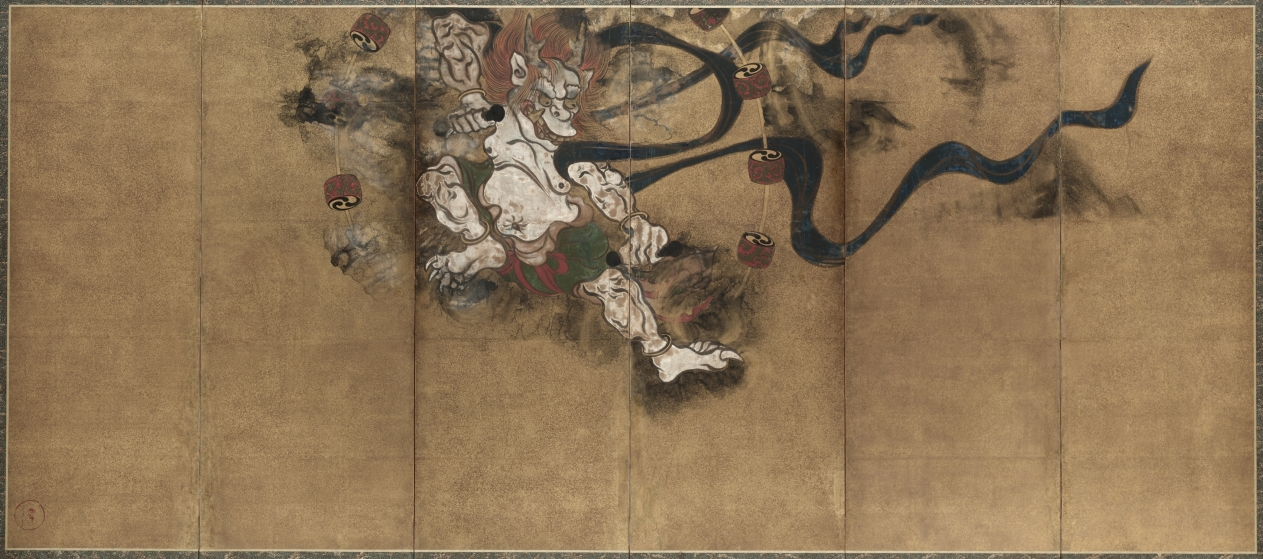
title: God of Thunder (Raijin)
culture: Japan, Edo period (1615–1868)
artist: studio of Tawaraya Sōtatsu (Japanese, c. 1570–c. 1640)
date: mid-1600s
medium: six-panel folding screen; ink, color, and gold on paper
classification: Painting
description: Such depictions of the God of Thunder originated in Buddhist art. Here, the image was painted on paper covered with gold dust, a technique often found in paintings by Tawaraya Sotatsu or of the Sotatsu school. This gold technique and the "Inen" seal here suggest that the anonymous painter of this screen was probably associated with the Sotatsu workshop. The artist used a prototype borrowed from earlier Japanese narrative painting—rather than mechanically reproducing Sotatsu’s image—and created a bold, innovative image that served the world of play and leisure in early Edo Japan. The theme of "God of Thunder" was often paired with "God of Wind" and has been frequently reinterpreted by generations of Rimpa artists. Unfortunately, the screen God of Wind which would have accompanied this God of Thunder cannot be located.